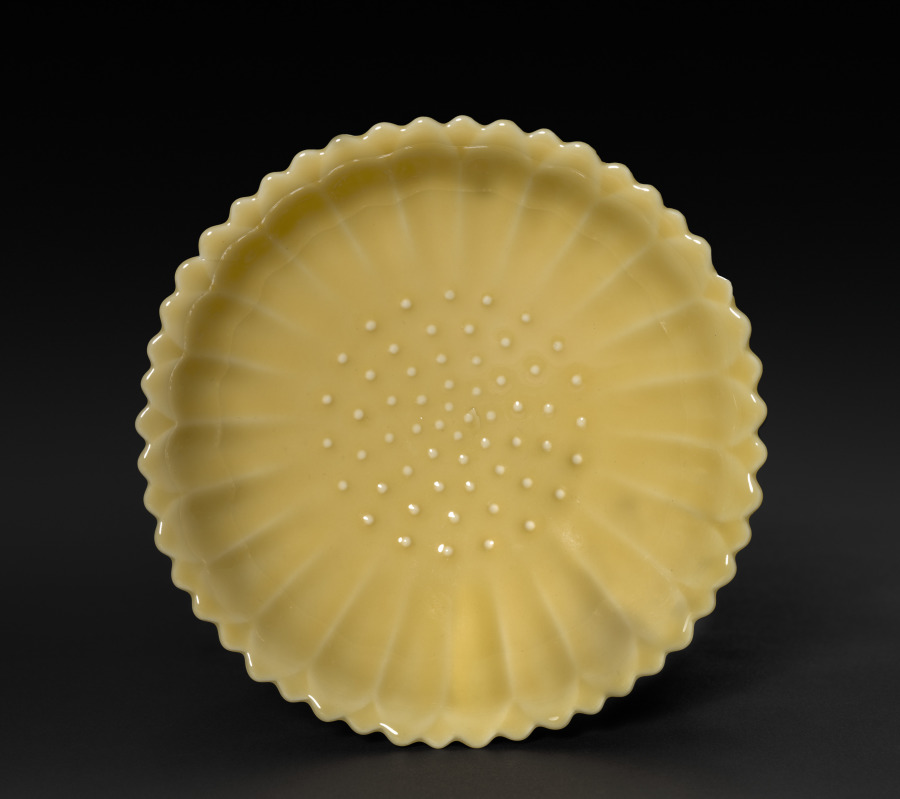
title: Chrysanthemum-Shaped Dish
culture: Japan, Taishō period (1912–26)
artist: Seifū Yohei IV (Japanese, 1872–1951)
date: 1914–46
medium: Porcelain with yellow glaze and molded decoration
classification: Ceramic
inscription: 清風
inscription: 清風造 【印】 清風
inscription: 【印】 清風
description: Like his father, Yohei IV also produced works with red or yellow monochrome glazes. His yellow-glazed works include this sweets bowl molded into the shape of a chrysanthemum, a set of five drinking cups CMA 2022.217, and a pair of sake pourers CMA 2022.216.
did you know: Seifū Yohei IV won a gold medal at the 1915 Panama-Pacific International Exposition in San Francisco for his ceramics.